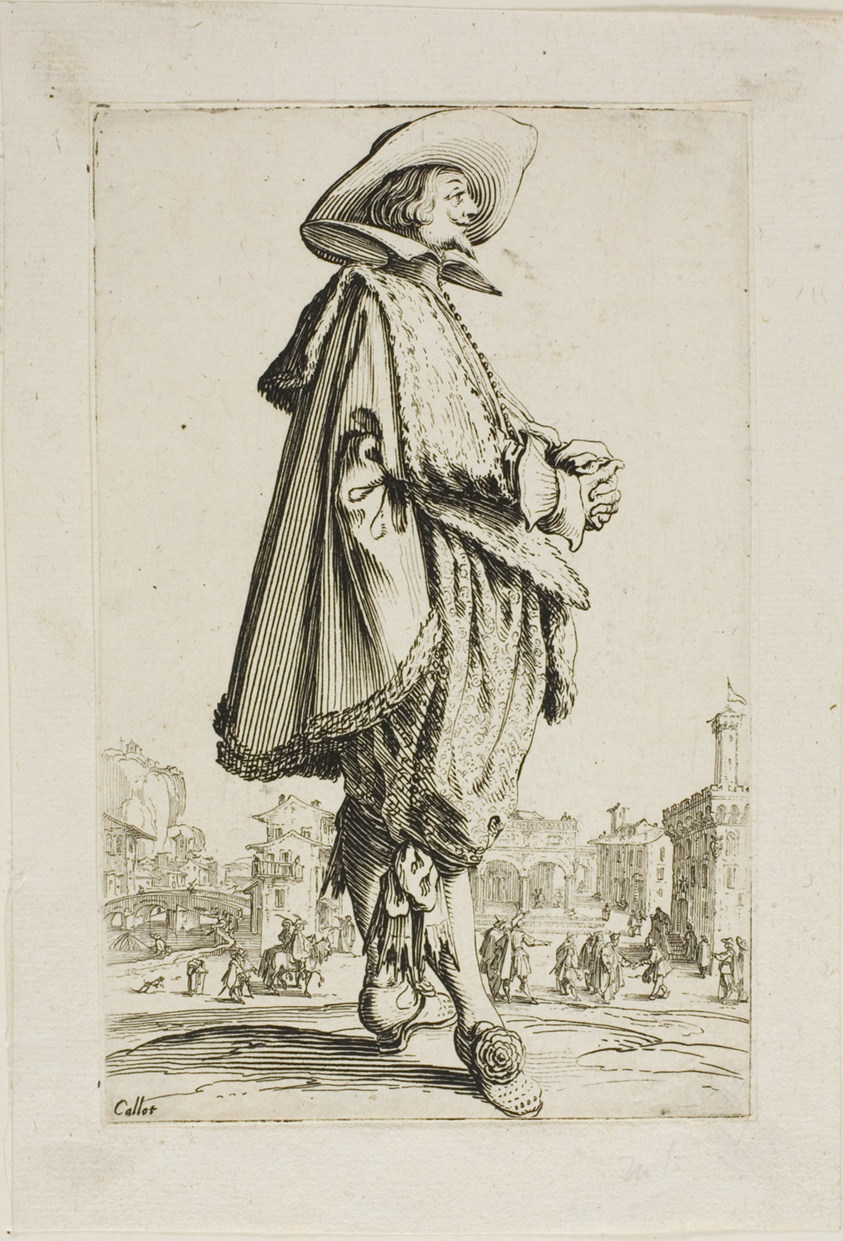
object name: Print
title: The Gentleman with Clasped Hands, plate eleven from La Noblesse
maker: Jacques Callot (French, 1592-1635)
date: c. 1625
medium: Etching on paper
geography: France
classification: etching; print; prints and drawing